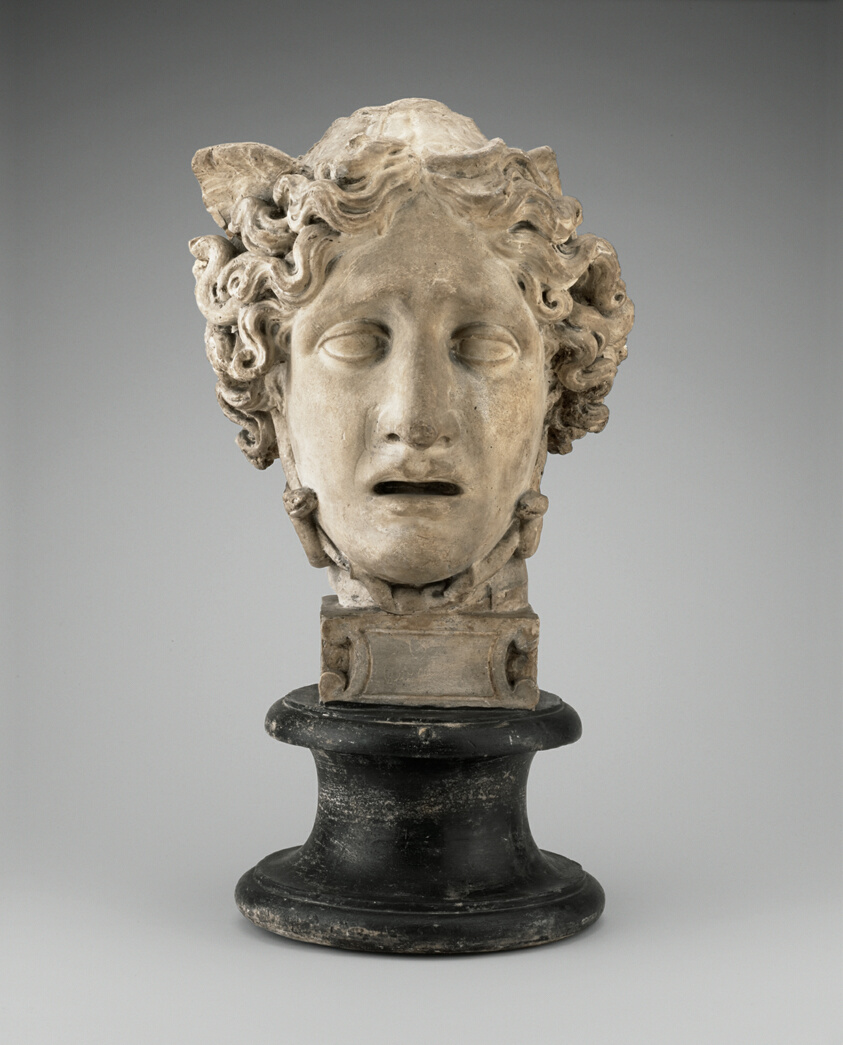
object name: Sculpture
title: Head of Medusa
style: Neoclassicism, nineteenth century, 19th century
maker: Antonio Canova (Italian, 1757–1822)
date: c. 1801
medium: Plaster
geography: Italy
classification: sculpture; bust/head; Italian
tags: Greek mythology, mythological figures, mythical, woman, monsters, mythology